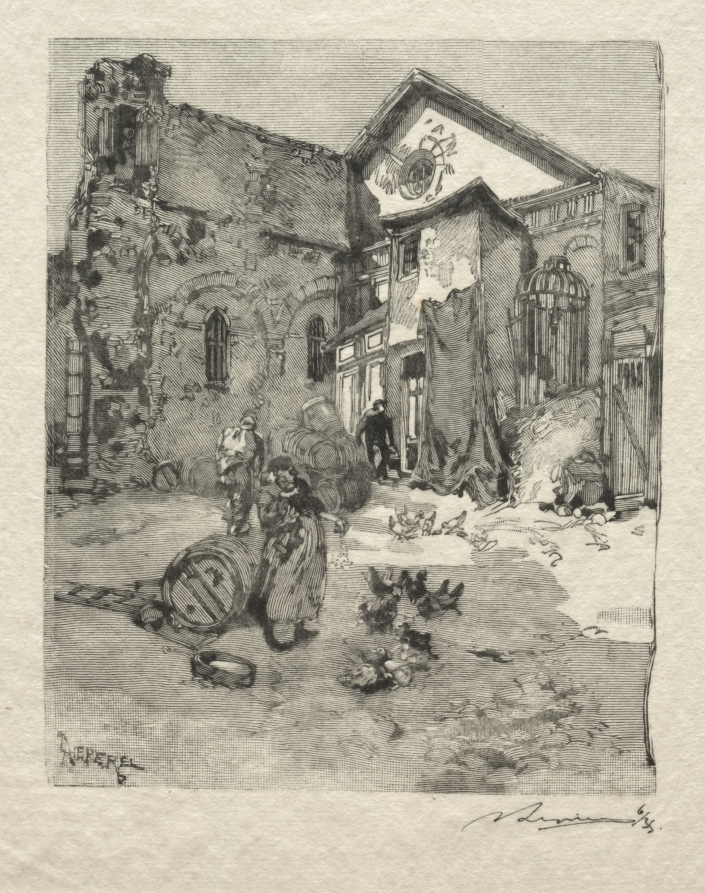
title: St. Julien le Pauvre: Le Portail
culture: France, 19th-20th century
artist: Auguste Louis Lepère (French, 1849–1918)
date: c. 1870–1918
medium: wood engraving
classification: Print